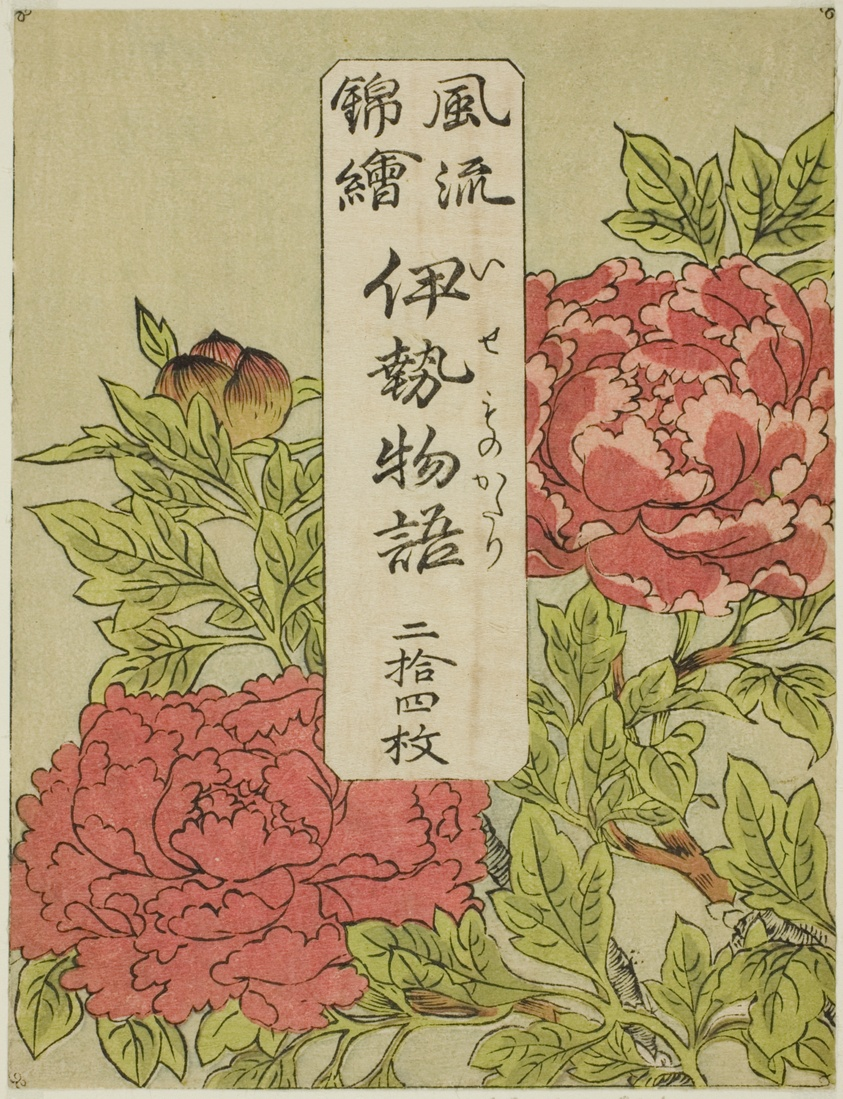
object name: Print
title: Color-Printed Wrapper for the series "Furyu Nishiki-e Ise Monogatori"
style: Japanese (culture or style)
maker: Katsukawa Shunsho 勝川 春章; Japanese, 1726-1792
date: c. 1772/73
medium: Color woodblock print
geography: Japan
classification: woodblock print; print; asian art